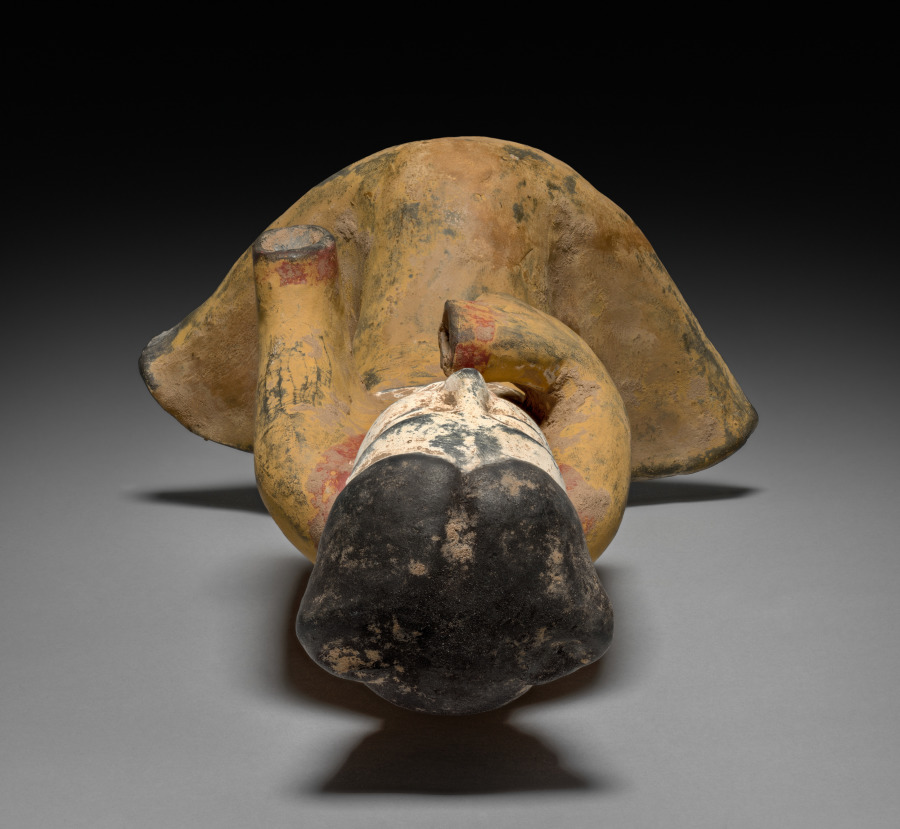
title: Kneeling Woman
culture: China, Western Han dynasty (206 BCE–8 CE) to Eastern Han dynasty (25–220 CE)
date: 100 BCE–100 CE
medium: painted earthenware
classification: Sculpture